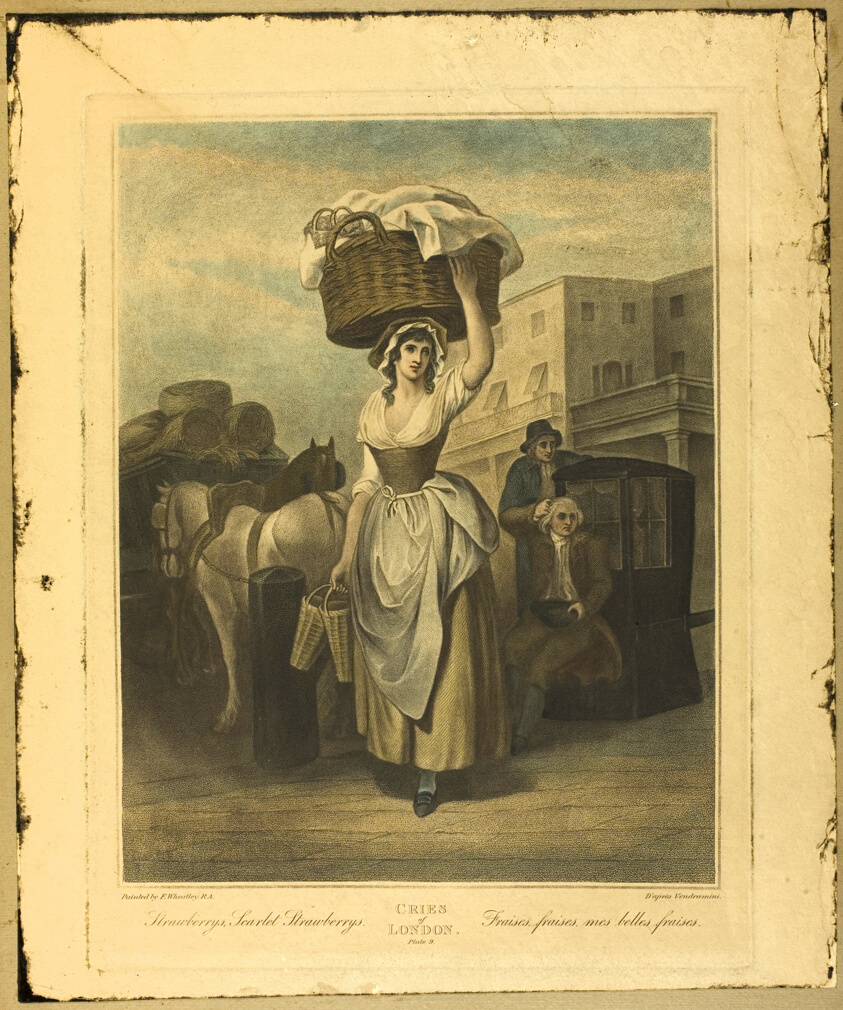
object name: Print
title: Strawberries, Scarlet Strawberries, Plate 9 from The Cries of London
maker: After Francis Wheatley; English, 1747-1801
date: 1799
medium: Stipple engraving in brown, with hand-colored additions, on cream wove paper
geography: England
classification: engraving; print; prints and drawing